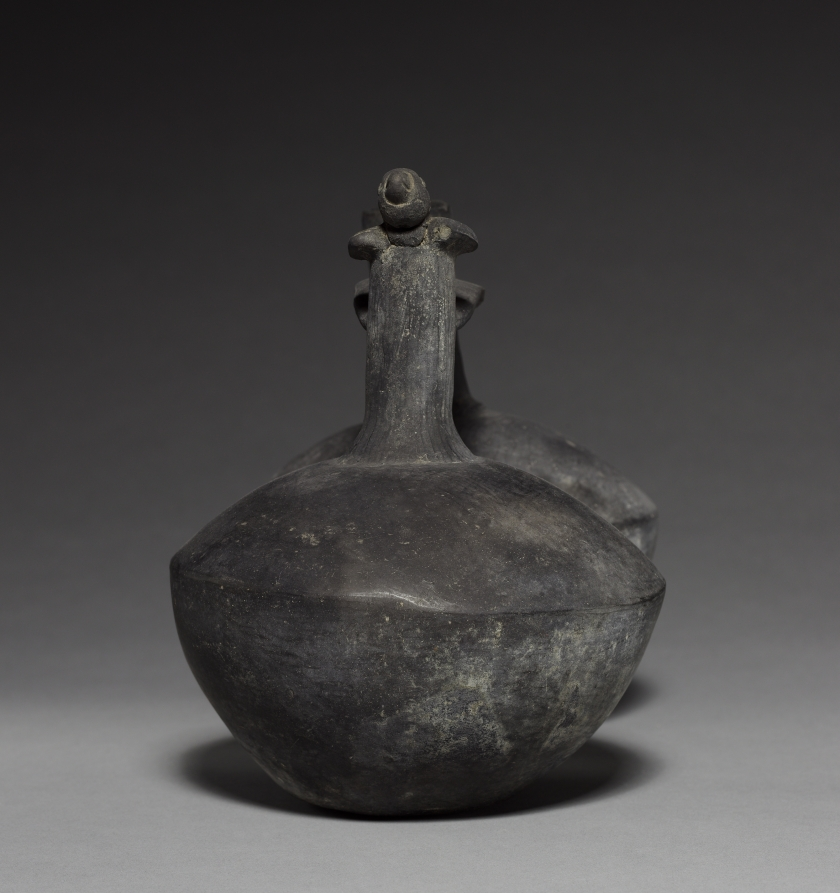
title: Bottle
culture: Peru, Chimú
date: 1300–1400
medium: pottery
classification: Ceramic